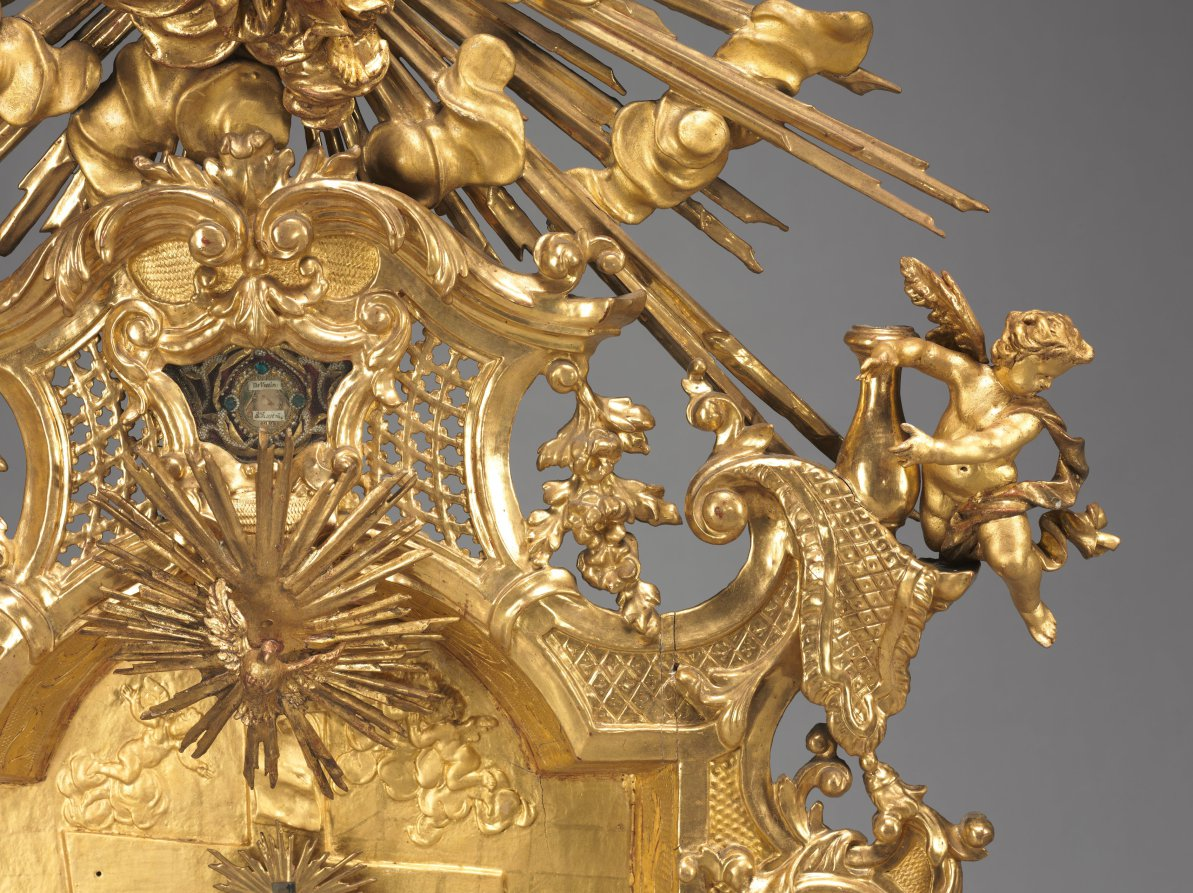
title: Altarpiece with Relics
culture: Germany, Bavaria, 18th century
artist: Joseph Matthias Götz (German, 1696–1760)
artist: and Workshop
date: c. 1735–40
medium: gilded wood, with relics in niches: gilded wood, mother-of-pearl, ebony, red silk, gold wire, seed pearls, rock crystal, pen and ink on paper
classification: Sculpture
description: Götz covers every surface in gold leaf, giving each part of the object equal importance, rather than simply framing a central picture. In this distinctively Central European approach, figural narrative is subordinate to the overall ensemble. Götz designed this object to rest on top of an altar, probably in front of a larger painted or sculpted decorative scheme. The work contains relics seen through the small windows on the perimeter. These small remains of holy figures demonstrate the persistence of a medieval Catholic tradition well into the 1700s.